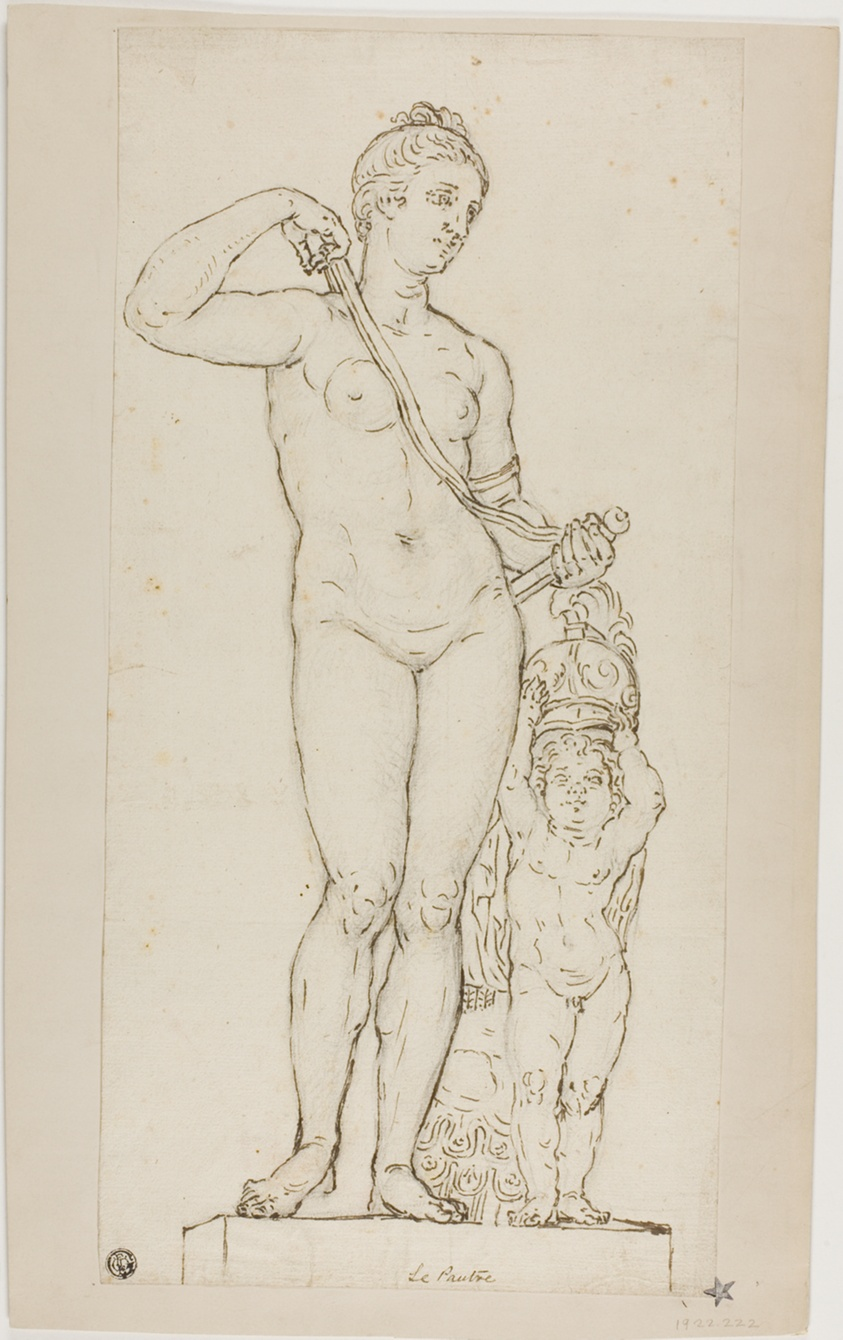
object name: Drawing and Watercolor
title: Sculpture of Venus and Cupid, with Mars' Armor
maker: Possibly after Jean Le Pautre; French, 1618-1682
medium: Pen and brown ink over black chalk on cream laid paper, perimeter mounted on cream wove card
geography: France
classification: pen and ink drawings; drawings (visual works); prints and drawing